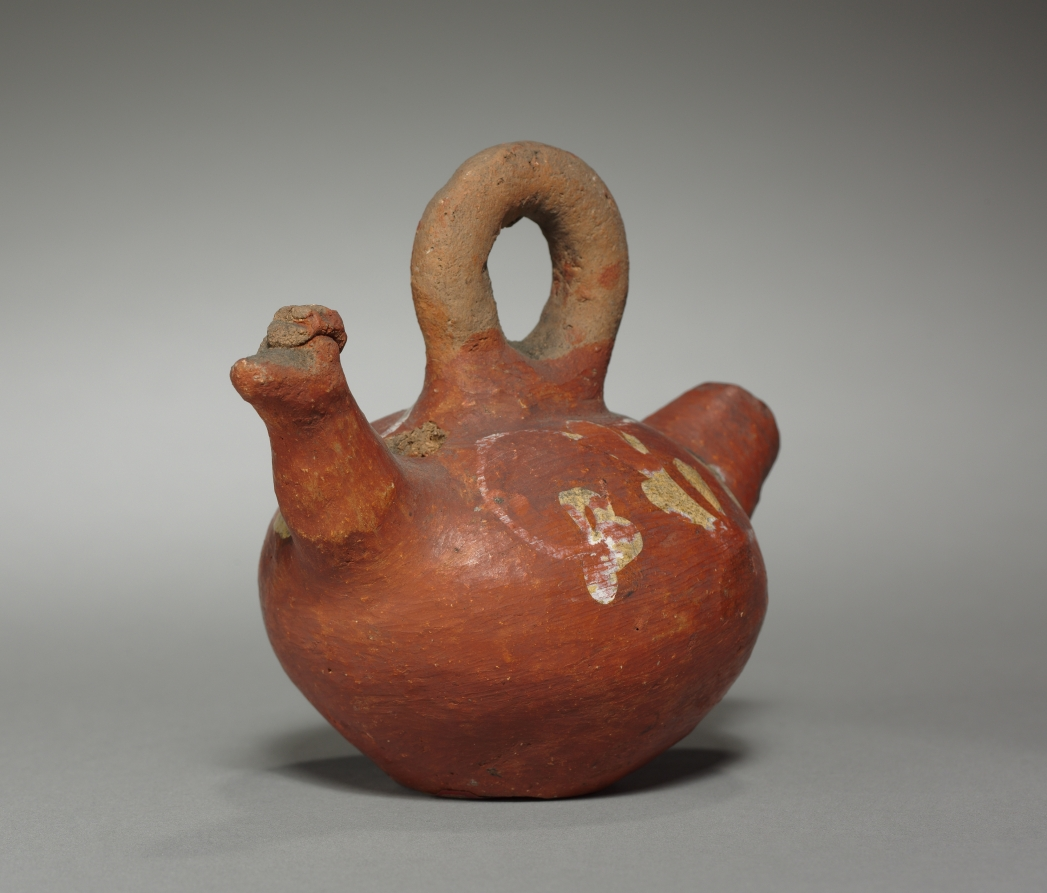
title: Bottle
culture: Peru, 20th century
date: 1900–1920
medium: pottery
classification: Ceramic